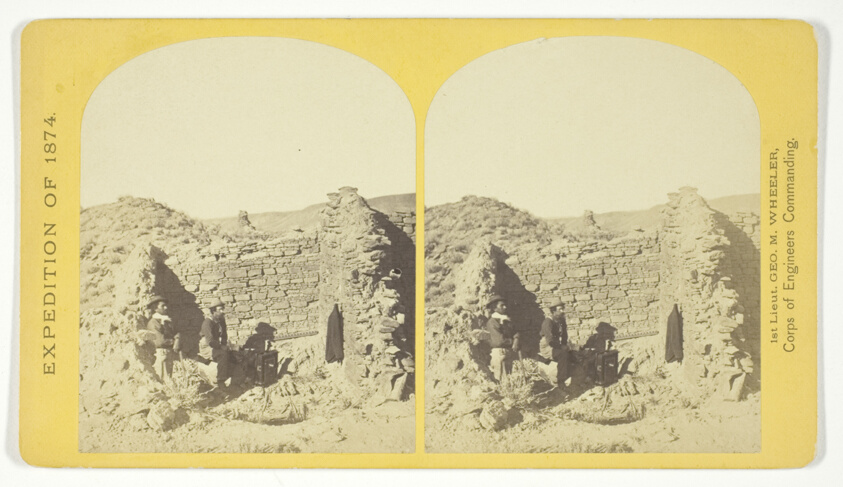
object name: Photograph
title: Characteristic ruin, of the Pueblo San Juan, New Mexico, on the north bank of the San Juan River, about 15 miles west of the mouth of Cañon Largo. The present race of Indians know nothing of when or by whom these buildings were constructed. The ruin is about 350 feet square, and built of natural stone, joined together by a mud cement, No. 43 from the series "Geographical Explorations and Surveys West of the 100th Meridian"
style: 19th century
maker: Timothy O'Sullivan (American, born Ireland, 1840–1882); commissioned by George Wheeler for the War Department, Corps of Engineers, U.S. Army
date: 1874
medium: Albumen print, stereo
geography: United States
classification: stereograph (albumen); photography; photograph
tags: Collected by Hugh Edwards, Geographical Explorations and Surveys